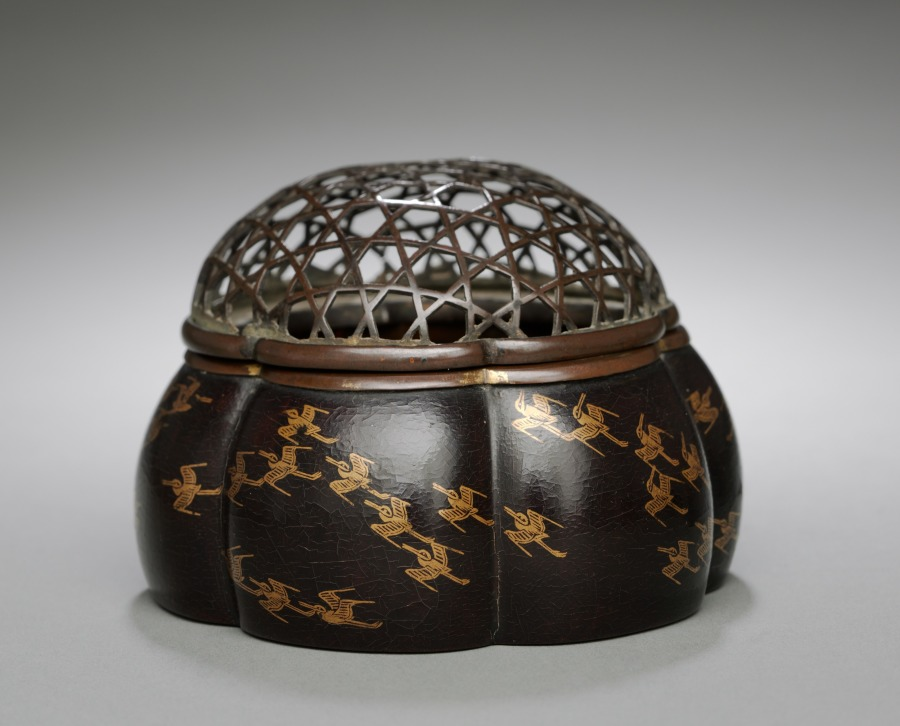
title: Incense Burner with Lid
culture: Japan, Nanbokuchō period (1336–92)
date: late 1300s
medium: black lacquer on wood with decoration in maki-e; metal rims; bronze lid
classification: Lacquer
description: This container's repeated, undulating, rounded sides evoke waves over which the articulated plovers sweep. The bronze cover (probably a later addition) mimics the design of a fishing weir. Overall, the container brings to mind the seashore. The earthy quality of the lacquered surface demonstrates the interaction between a man-made pattern (the plovers) and the somewhat unexpected surface of a natural material such as wood.